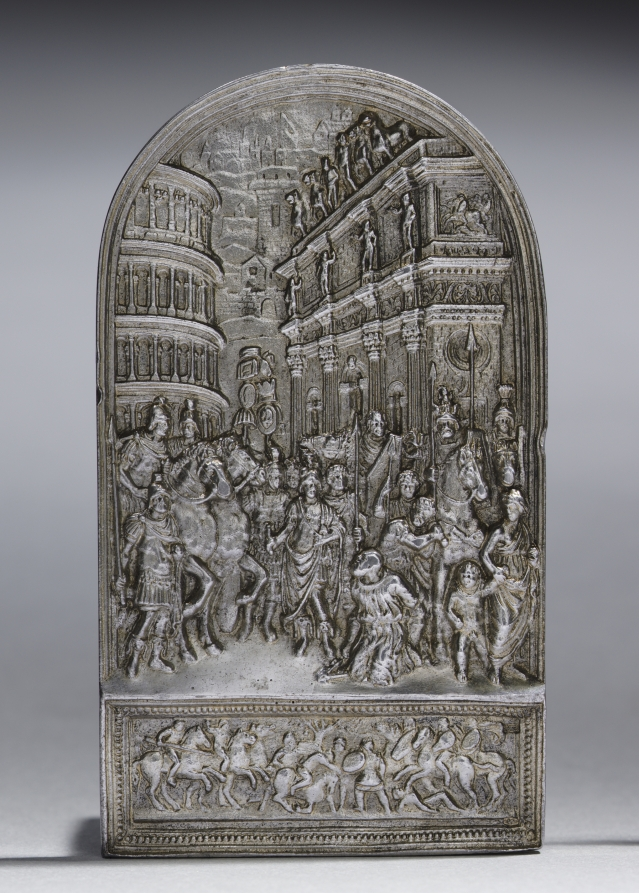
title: Martyrdom of a Saint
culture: Northern Italy, early 16th century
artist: Hermann Samuel Ratzerdorfer (Austrian, 1815–1891)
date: after 1866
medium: silver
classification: Sculpture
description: Recent research has revealed that this plaquette—long characterized as an Italian object from the 1500s—is indeed by the hand of a 19th-century silversmith working in Vienna. The subject of the Renaissance-style object also cannot be precisely identified, although it was long associated with the beheading of Saint Paul.